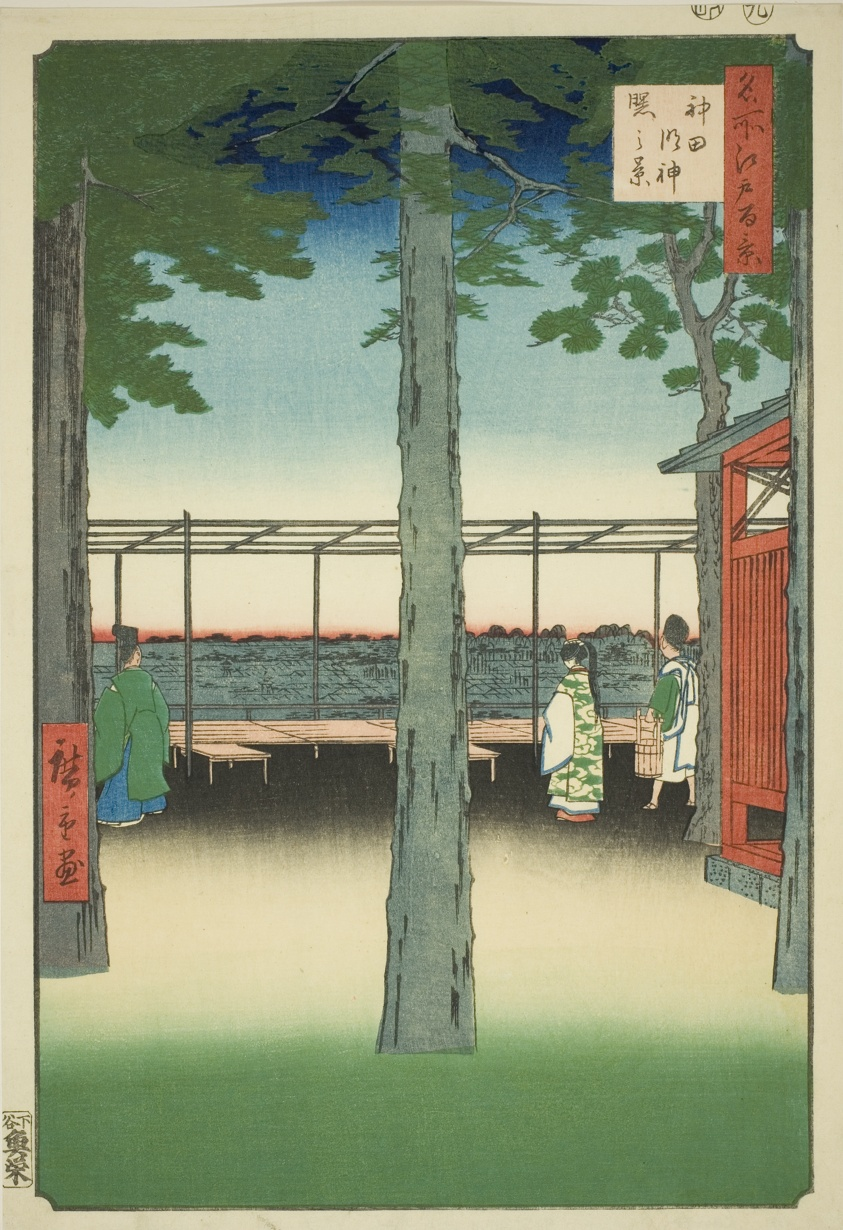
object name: Print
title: Dawn at Kanda Myojin Shrine (Kanda Myojin akebono no kei), from the series "One Hundred Famous Views of Edo (Meisho Edo hyakkei)"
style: Japanese (culture or style)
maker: Utagawa Hiroshige 歌川 広重; Japanese, 1797-1858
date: 1857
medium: Color woodblock print; oban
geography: Japan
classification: woodblock print; print; asian art